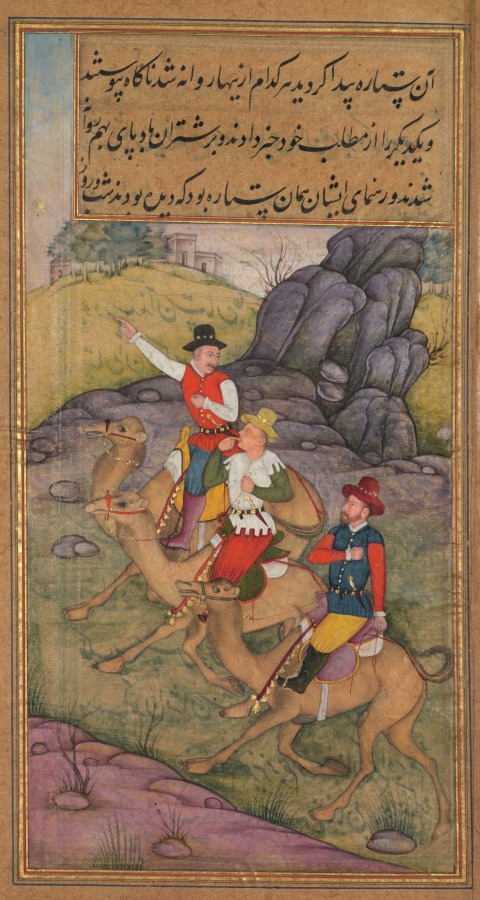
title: The Magi Follow the Star (folio 34 recto), from a Mirror of Holiness (Mir’at al-quds) of Father Jerome Xavier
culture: Mughal India, Allahabad, made for Prince Salim (1569–1627)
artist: attributed to Payag (Indian)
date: 1602–4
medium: Gum tempera, ink, and gold on paper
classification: Manuscript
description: One of the three kings points excitedly at the star at the upper left edge of the page, while another bites the finger of astonishment; the third holds his fist over his heart. They are all dressed like Portuguese merchants, but they ride camels associated with their homeland in Arabia, as specified in the text. The Westerners whom Mughals would have seen, besides priests, were mainly merchants from the Portuguese port of Goa on India’s western coast. They regularly visited Akbar to negotiate trade agreements, so they served as the primary visual model for all nonclerical Europeans. The artists who produced this manuscript worked for Akbar before joining Prince Salim at his rebel court in Allahabad.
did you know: At the breakaway court of Prince Salim in Allahabad, high-quality materials were not as plentiful as in the imperial capital. The paper is brittle and has browned excessively, and the paint films are relatively thin; here the text from the verso shows through the lightly colored background.